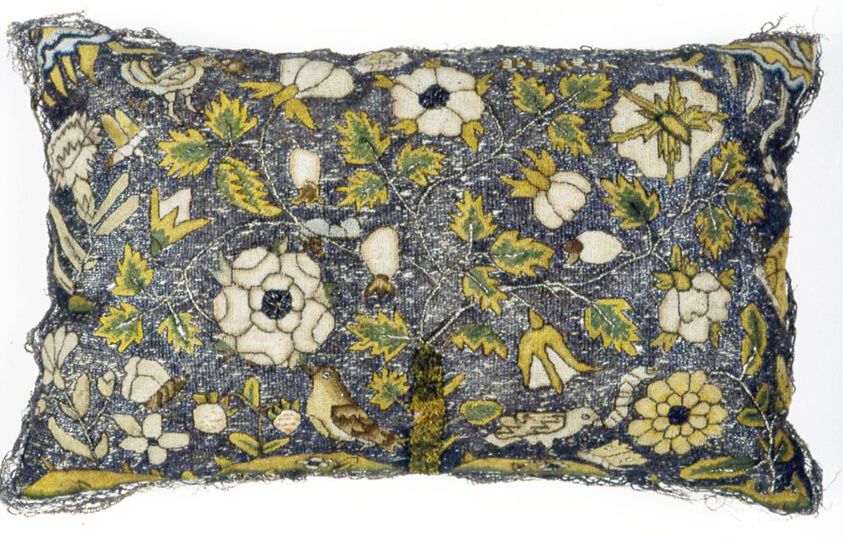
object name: Textile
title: Pillow cover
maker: England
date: c. 1620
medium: Linen, plain weave; embroidered with silk, silvered-metal-strip-wrapped silk and silvered-metal coils in stem filling and tent stitches; laid work, couching and French knots; edged with silvered-metal-strip-wrapped silk, bobbin straight lace; backed with silk, plain weave; quilted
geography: England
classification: textile; needlework (visual works)